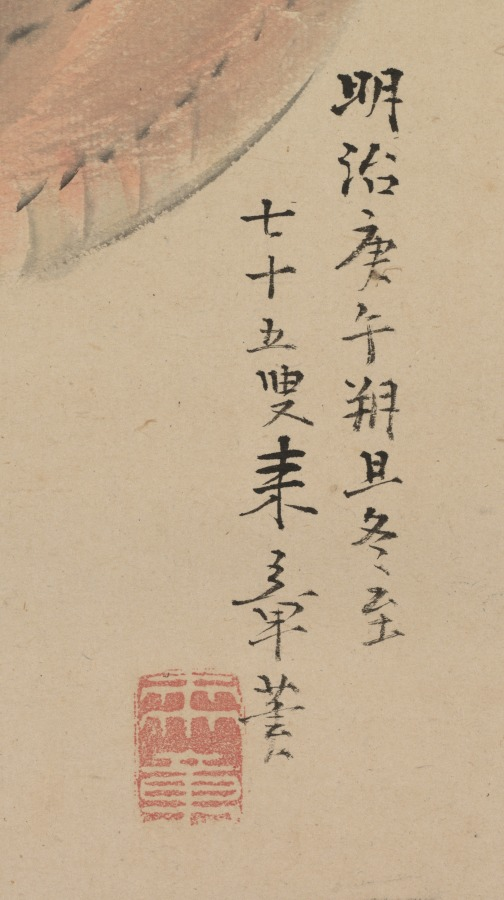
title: Needlefish (Yagara)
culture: Japan, Edo period (1615–1868)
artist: Nakajima Raishō (Japanese, 1796–1871)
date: 1870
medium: hanging scroll; ink and color on paper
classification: Painting